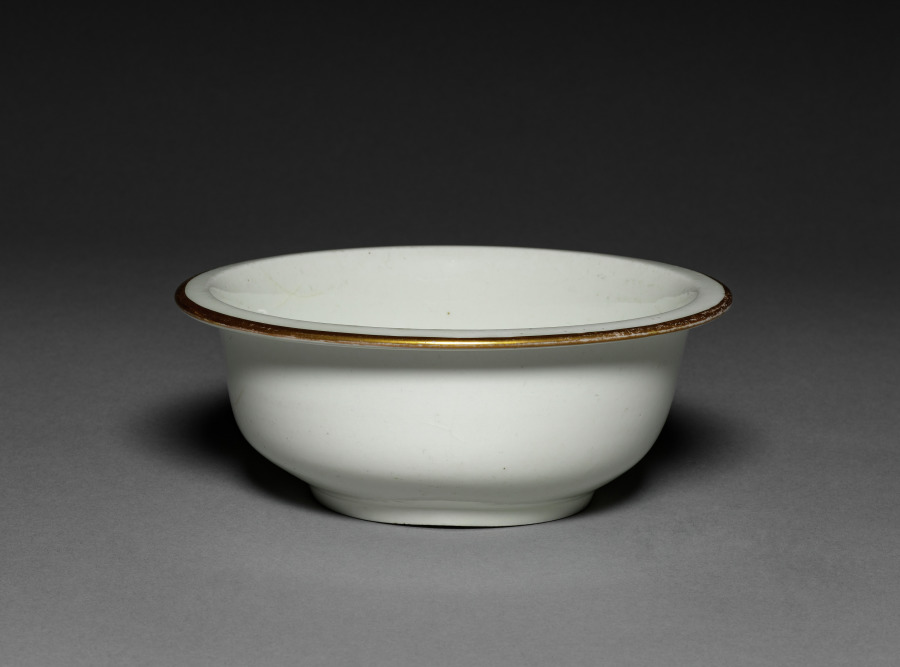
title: Liner for an Ice Pail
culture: England, Derby, 18th-19th century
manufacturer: Derby (Crown Derby Period) (British)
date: 1700s - 1800s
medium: porcelain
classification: Ceramic